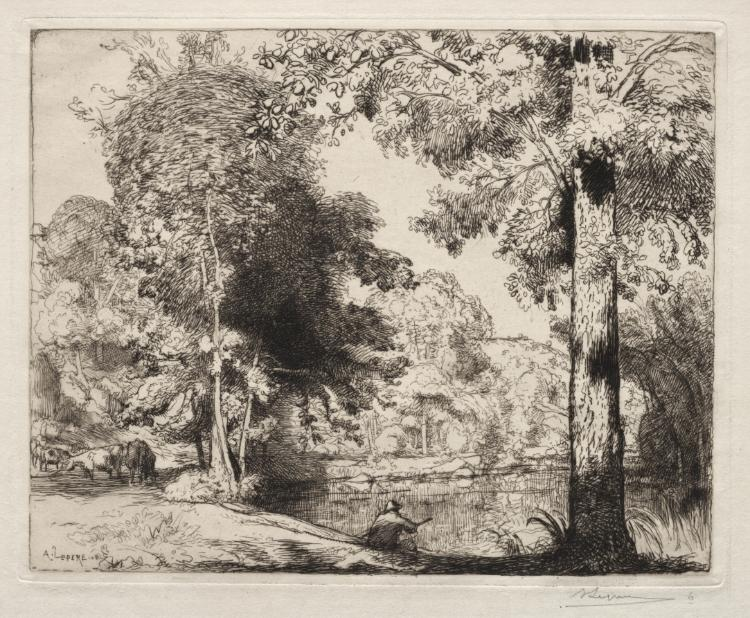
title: Bords de la Vie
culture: France, 19th-20th Century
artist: Auguste Louis Lepère (French, 1849–1918)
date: 1908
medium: etching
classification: Print